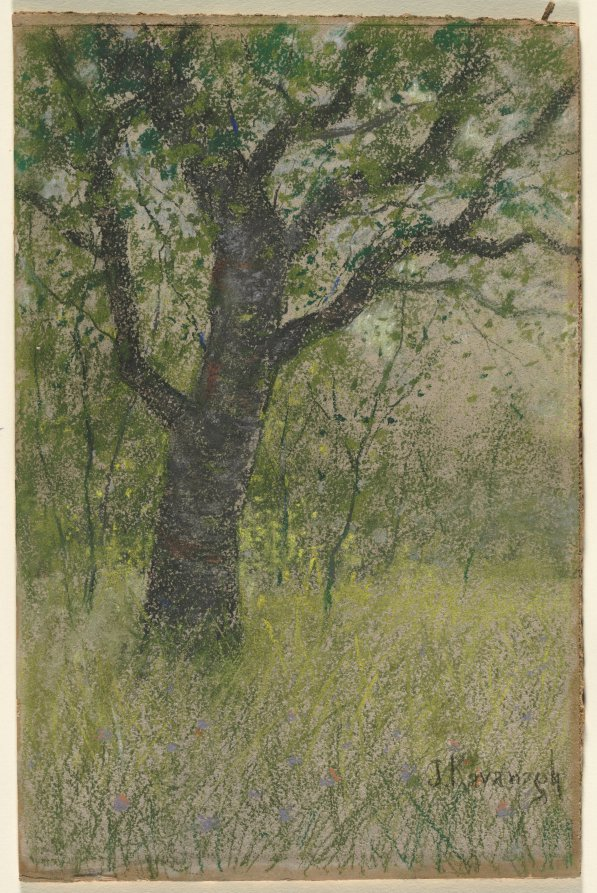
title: Landscape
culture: America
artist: John Kavanagh (American, 1857–1898)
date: c. 1877–98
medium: pastel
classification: Drawing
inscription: Signed "J. Kavanagh" lower right